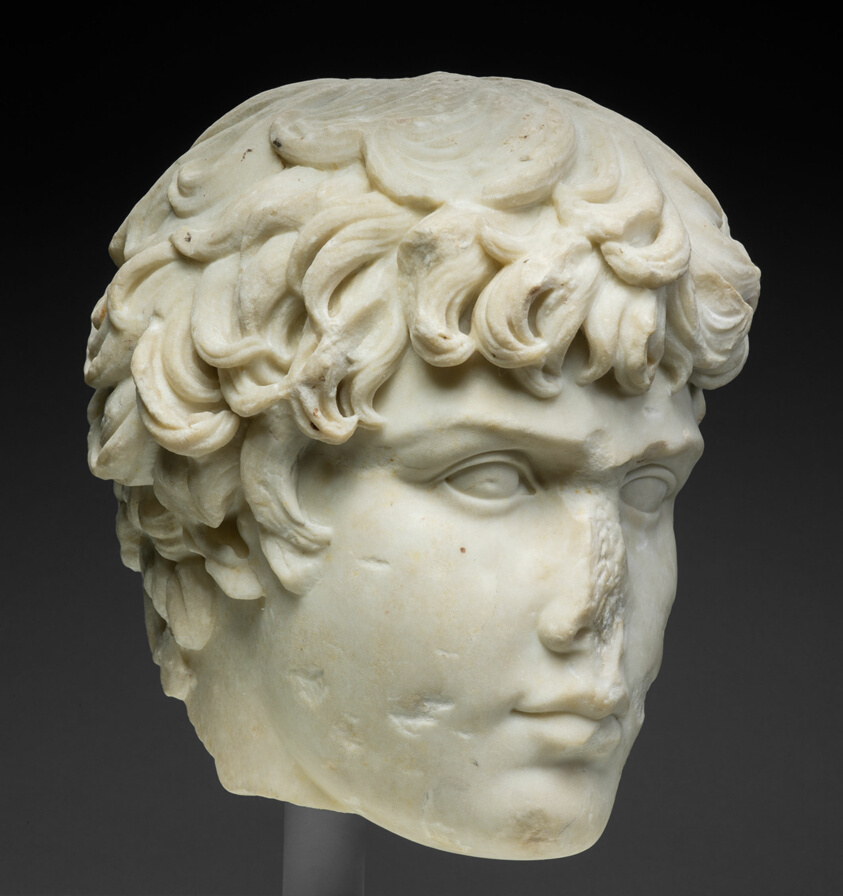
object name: Sculpture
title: Fragment of a Portrait Head of Antinous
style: imperial (roman), ancient, roman (ancient, style or period)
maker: Roman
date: 130-138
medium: Marble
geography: Italy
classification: marble; stone; sculpture; ancient art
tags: portraits